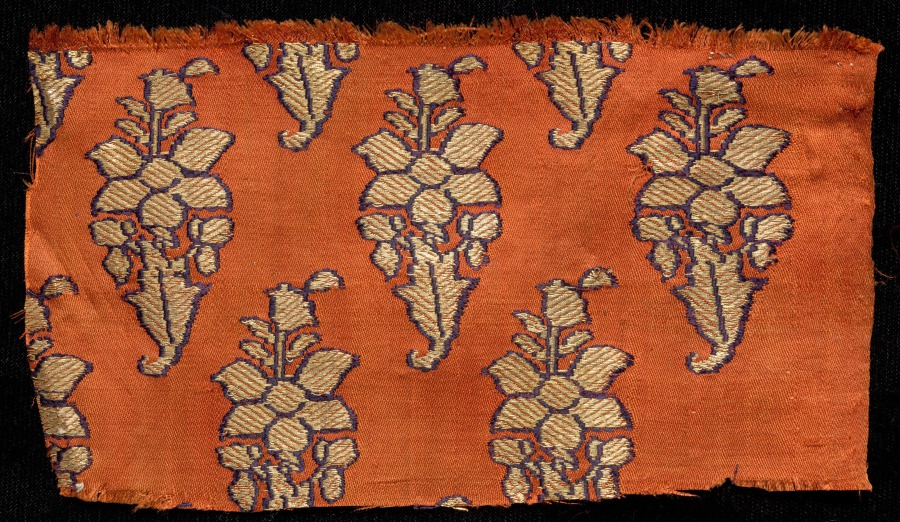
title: Brocade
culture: India, Benares ?, 19th century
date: 1800s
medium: brocade, "kimkhwab"; silk and gold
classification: Textile